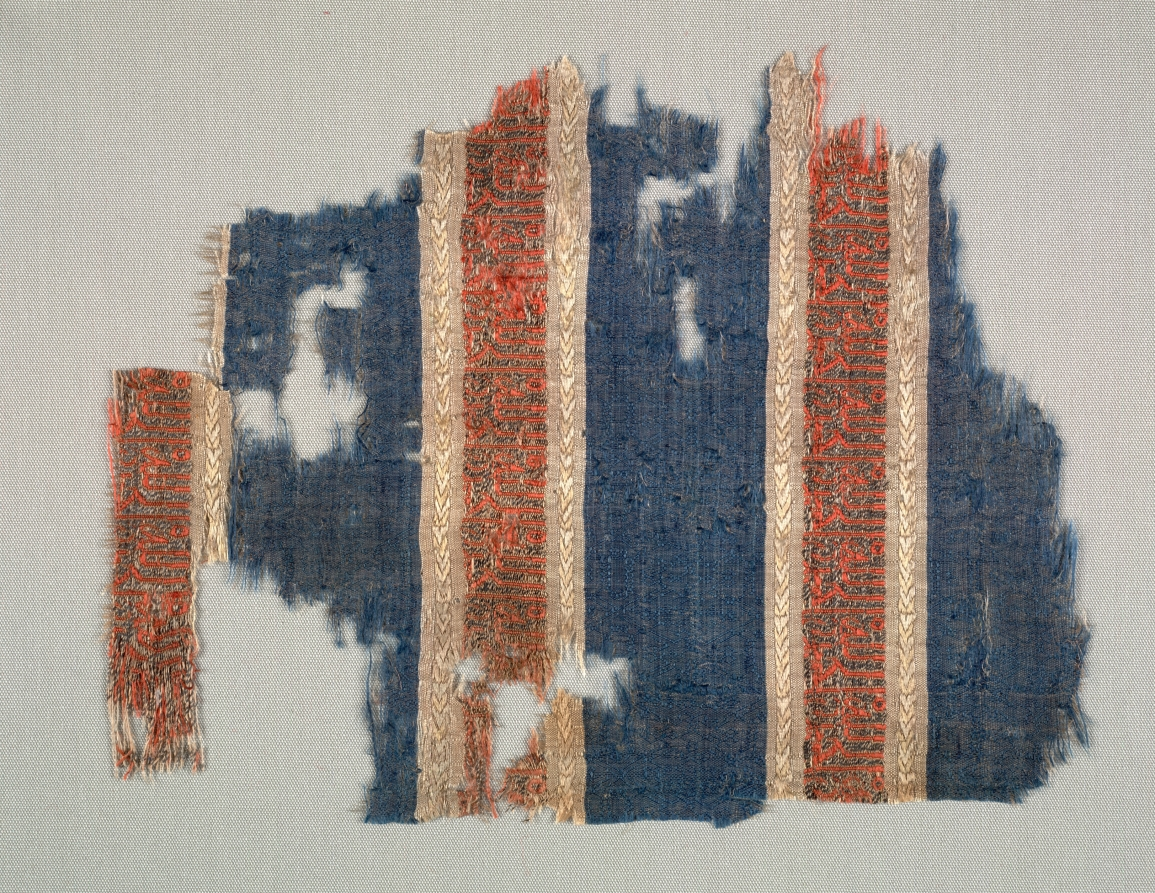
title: Silk fragment with decorated and inscribed bands, from the tomb of Don Felipe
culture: Spain, probably Almeria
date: 1200s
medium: Silk: plain weave with supplementary weft, silk and silver thread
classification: Textile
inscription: band of Naskhi inscription of red on silver which reads: "Praise be to God."